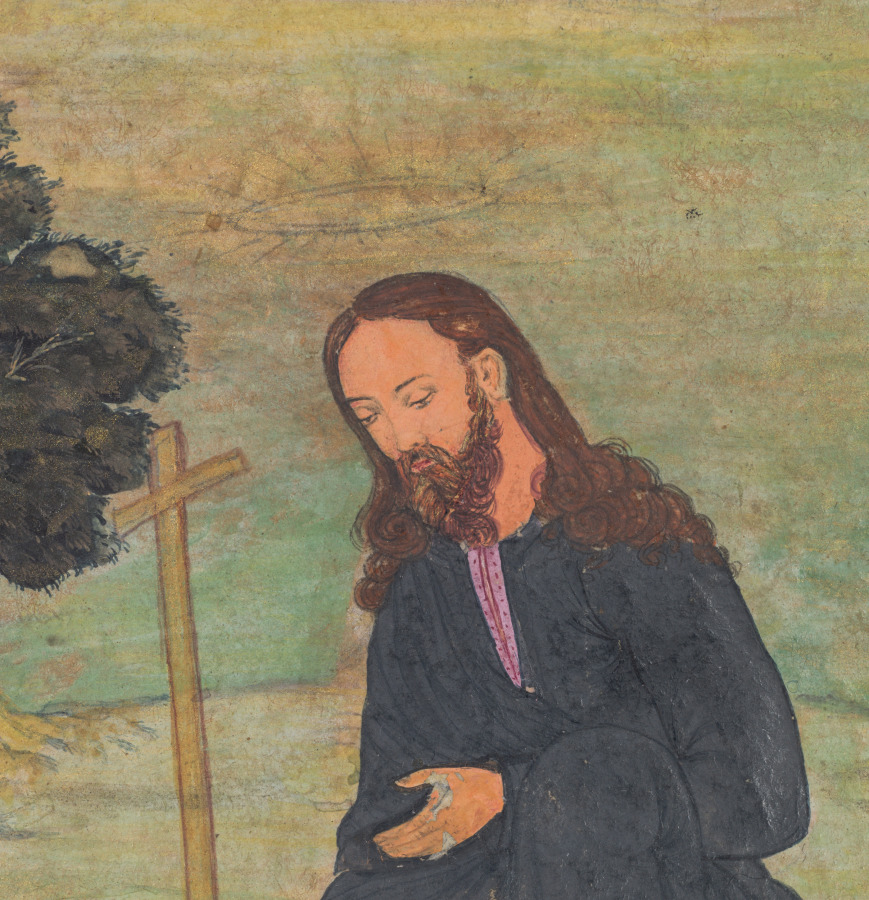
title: Angels bring food to Jesus in the wilderness (folio 55 recto), from a Mirror of Holiness (Mir’at al-quds) of Father Jerome Xavier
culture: Mughal India, Allahabad, made for Prince Salim (1569–1627)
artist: Muhammad Sharif (Indian, active c. 1600)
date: 1602–4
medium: Gum tempera, ink, color, and gold on paper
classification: Manuscript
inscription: Signature of the artist, Muhammad Sharif (Indian, active c. 1600), is written in the tiny pot by Jesus's foot.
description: To end his 40-day fast, five angels brought Jesus refreshments from heaven: breads, melons each with a knife for convenient cutting, fresh leeks, and what appear to be fragrant rice dishes and curries, along with cups of wine. Four of the angels are dressed in robes, and one is clothed only in feathers. After his baptism, Jesus spent 40 days and nights in the desert where he fasted, practiced spiritual exercises, and successfully resisted the temptations of Satan. Many of the rocks in this painting have faces, called grotesques. This page is the only surviving folio from this manuscript that has an artist’s signature, written in the tiny pot by Jesus’s foot.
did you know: The artist has put faces in the rocks, following a Persian convention.